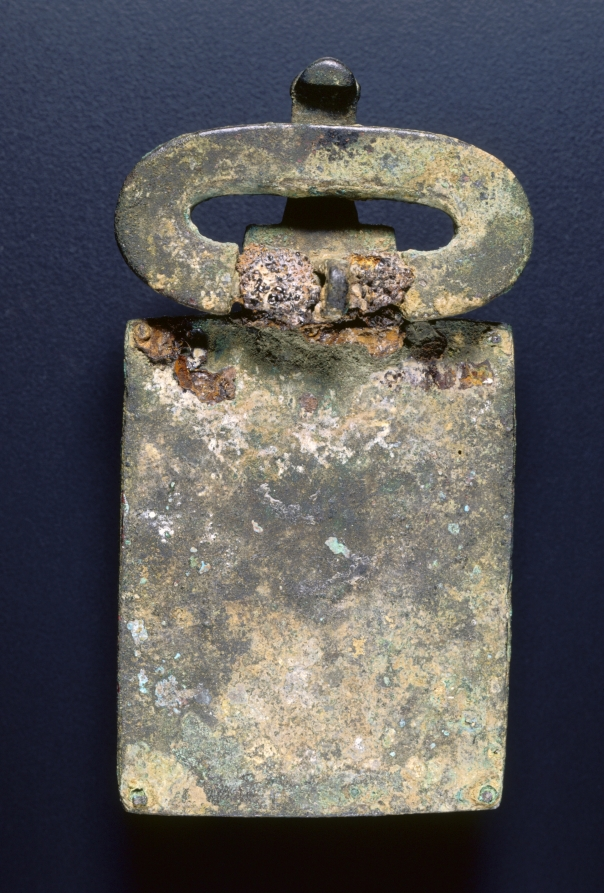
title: Belt Buckle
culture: Visigothic, Spain, Migration Period, 6th century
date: c. 525–560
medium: bronze with garnets, glass, mother of pearl, gold foil, traces of gilding; bronze and glass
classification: Jewelry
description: The art of the European Migration Period (3rd-7th centuries AD) is almost exclusively one of personal adornment-a portable art that followed men and women to their graves. Belt buckles with large rectangular attachment plates have been discovered in cemeteries across the Iberian Peninsula-now occupied by Spain and Portugal-from the period of Visigothic occupation (about AD 412-711). Their decoration varies. Finer examples, like this one, are distinguished by brilliantly inlaid semi-precious stones and colored glass. Garnets were especially prized in Visigothic society for use in cloisonné jewelry. The technique involved the fitting of carefully cut pieces of polished garnet into an intricate grid of compartments, or cloisons. This buckle is so densely inlaid with garnets that it presents a virtual "carpet" of red to the eye. These large Visigothic buckles are strikingly uniform in shape yet endlessly varied in surface design, perhaps a sign that they expressed the personal identities of their original owners. Grave excavations have shown that belt buckles of this type were made for women.